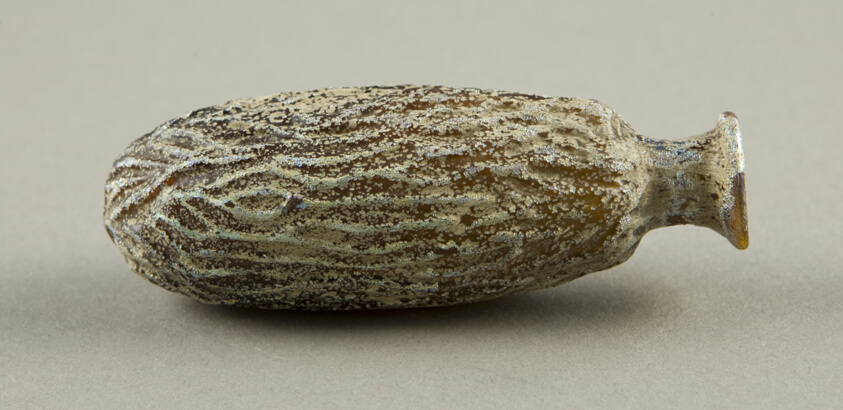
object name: Vessel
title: Flask in the Shape of a Date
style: roman (ancient, style or period)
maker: Roman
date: 1st century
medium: Glass, mold-blown technique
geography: Greece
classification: glass; vessel; ancient art